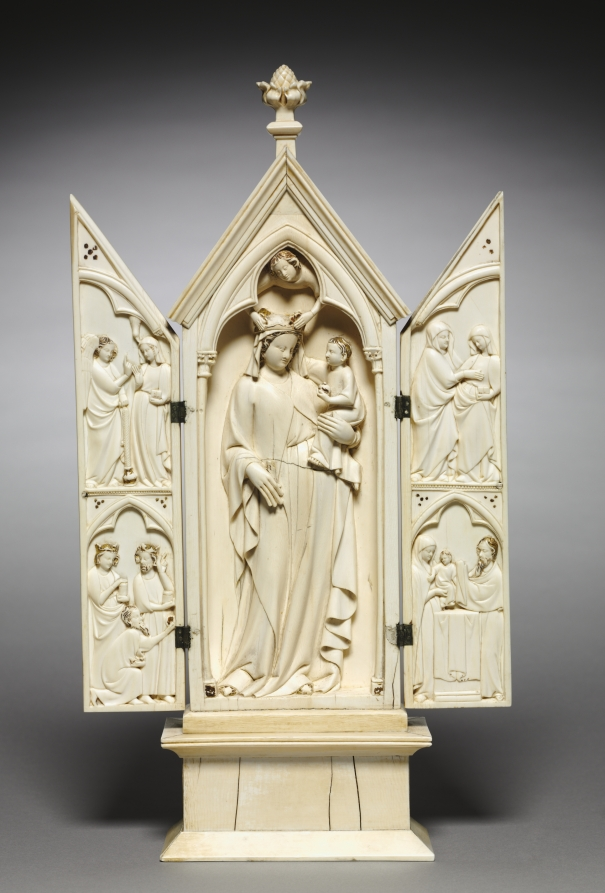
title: Triptych: The Life of the Virgin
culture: France, Lorraine?, or Austria?, Gothic period, 14th century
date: c. 1325–1350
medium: ivory, traces of gilding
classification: Ivory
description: The Virgin and Child, standing beneath a three-part arch, occupy the central plaque of this triptych. On the wings are carved four scenes from the life of the Virgin: the Annunciation, the Visitation, the Adoration of the Magi, and Christ's Presentation in the Temple. By the end of the 12th century, devotional objects like this became widespread in many parts of Western Europe as a result of the growing cult of the Virgin.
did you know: The pinnacle, roof moldings, and base are modern additions attached before the object entered our collection.